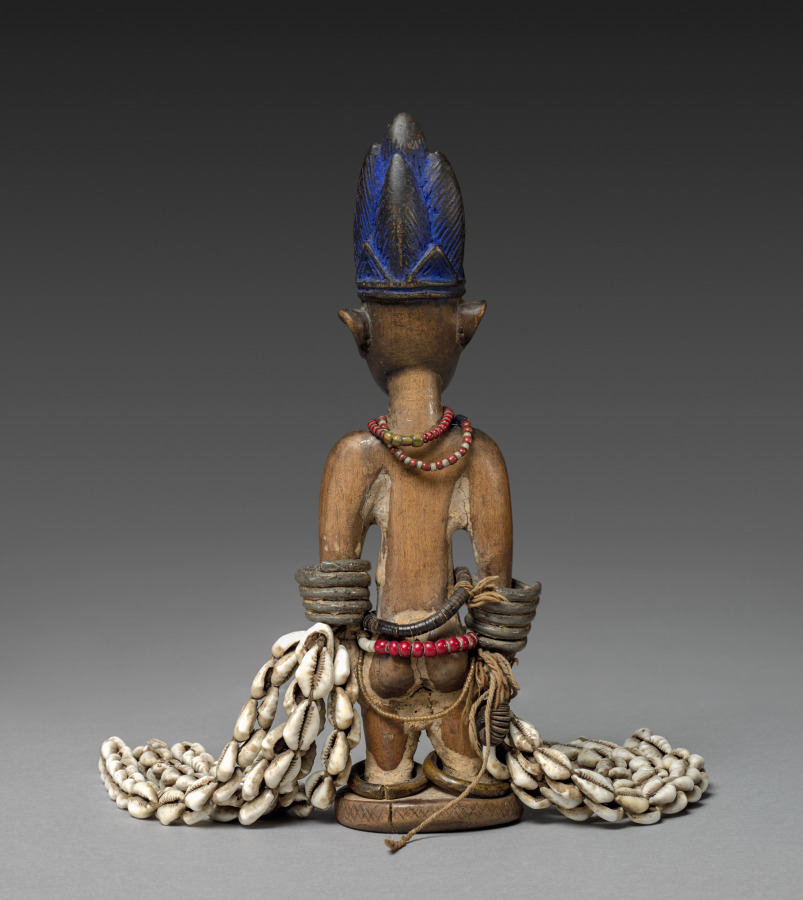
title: Twin Figure (Ère Ìbejì)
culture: Africa, West Africa, Nigeria, Yorùbá-style maker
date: late 1800s–early 1900s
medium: Wood, copper alloy, iron alloy, lead, glass beads, cowrie shells, twine, and pigment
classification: Sculpture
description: Such a figure is carved when a twin dies in infancy and serves as a memorial to the surviving sibling. These twin figures are always carved to look like adult individuals with idealized physical features. Various body adornments suggest the care parents devote to their children, while the erosion of facial features indicates the symbolic washing and feeding of the figure as a means to connect the soul of the deceased to that of the living twin.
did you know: This figure commemorates a twin that has died in infancy.